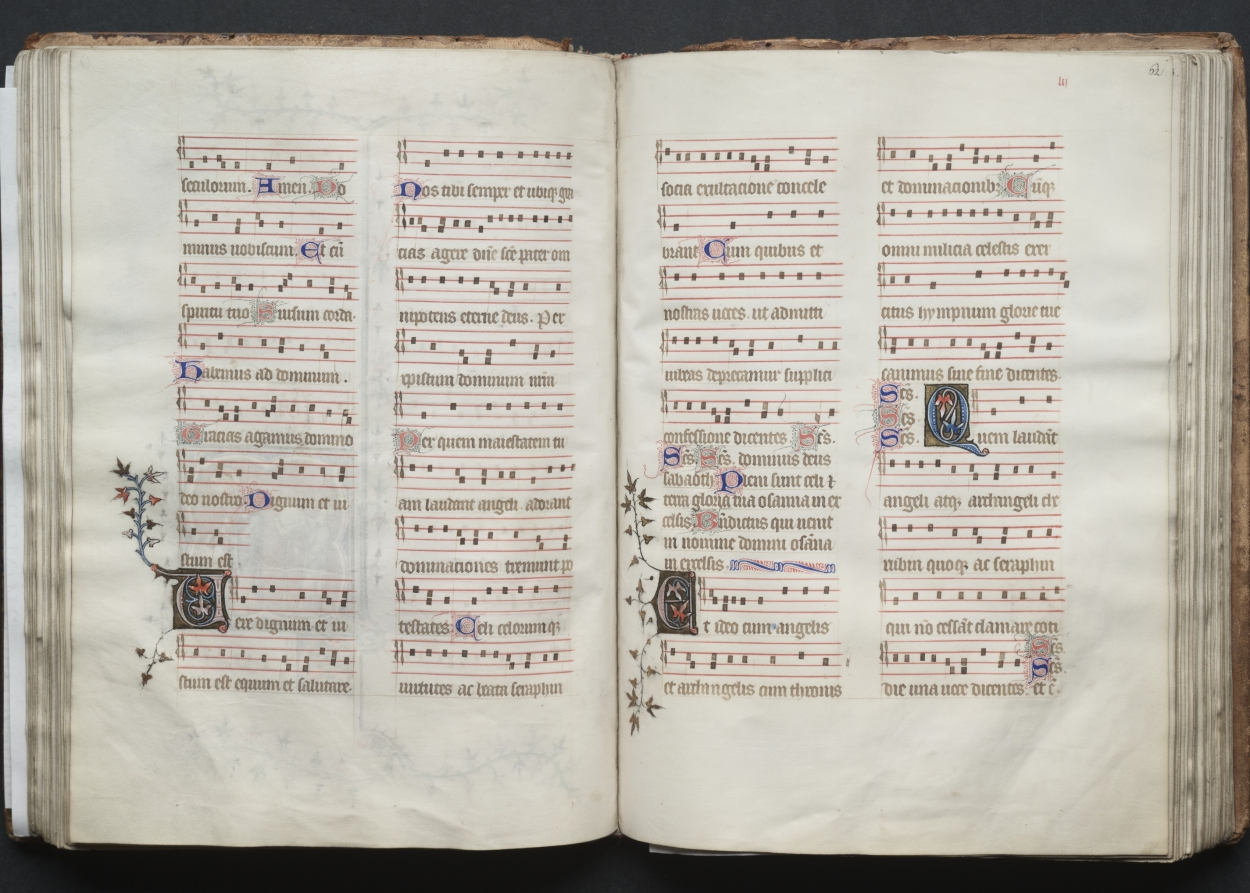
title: The Gotha Missal: Fol. 62r, Text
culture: France, Paris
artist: Master of the Boqueteaux (French)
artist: and Workshop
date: c. 1375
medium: ink, tempera, and gold on vellum; blind-tooled leather binding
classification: Bound Volume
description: The style and quality of this manuscript's decoration is typical of deluxe Parisian books made for aristocratic or royal patrons. Most of the book's decoration appears to be the work of the Master of the Boqueteaux, an artist active at the court of King Charles V (died 1380). His style was apparently shared by a number of book illuminators working in and around Paris. It is very possible that the Gotha Missal belonged to Charles V, but is not provable because the manuscript has no royal portraits and lacks a colophon. Given the book's magnificent decoration, however, it would seem that it was produced for a Valois prince, if not for the king himself. The manuscript receives its name from the German dukes of Gotha, its later owners.